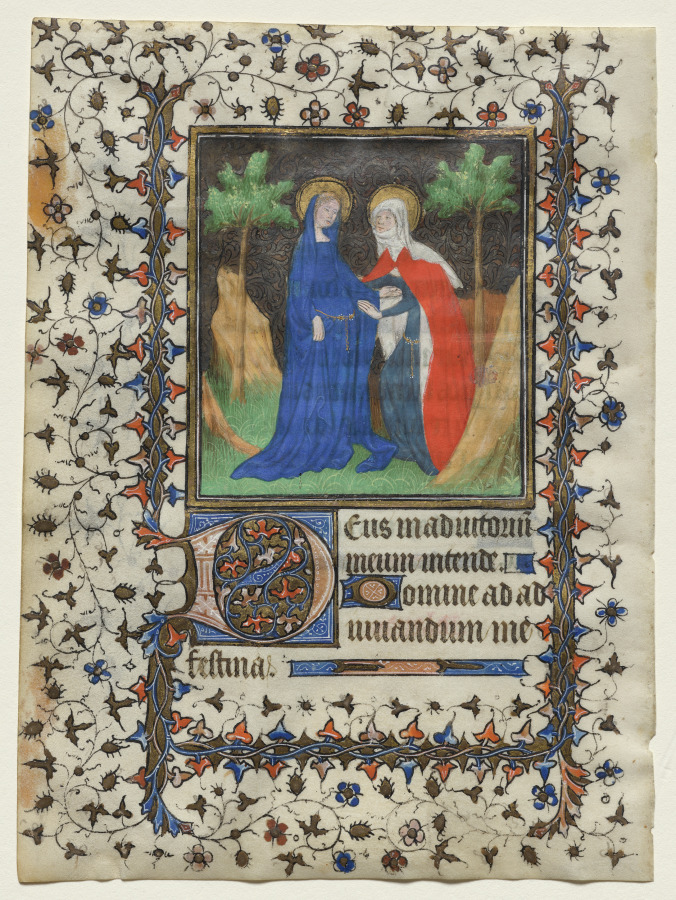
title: Leaf from a Book of Hours: The Visitation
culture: France, Paris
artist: workshop of Boucicaut Master (French, Paris, active about 1410–25)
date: c. 1415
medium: ink, tempera, and gold on vellum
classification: Manuscript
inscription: Deus in adiutorium meum intende. Domine, ad adiuvandum me festina.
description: The heart of every book of hours is the Hours of the Virgin. With this set of prayers, the reader asked the Virgin Mary to intercede on their behalf. The prayers come mostly from the Bible and include psalms, hymns, and readings. The Hours of the Virgin emerged from the eight “hours” of the day in the monastic world’s routine of daily prayers from daybreak to late at night. Originally used solely by the ordained, by the 1000s, these prayers had spread to the general population through their inclusion in books of hours. This section is traditionally illustrated by images from the life of the Virgin Mary, with each hour featuring a different event. The scene of the Visitation opens lauds, the prayers said at night or upon rising.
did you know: Highly customizable, the order of a book of hours shifts, and individual prayers vary, sometimes significantly, from region to region.